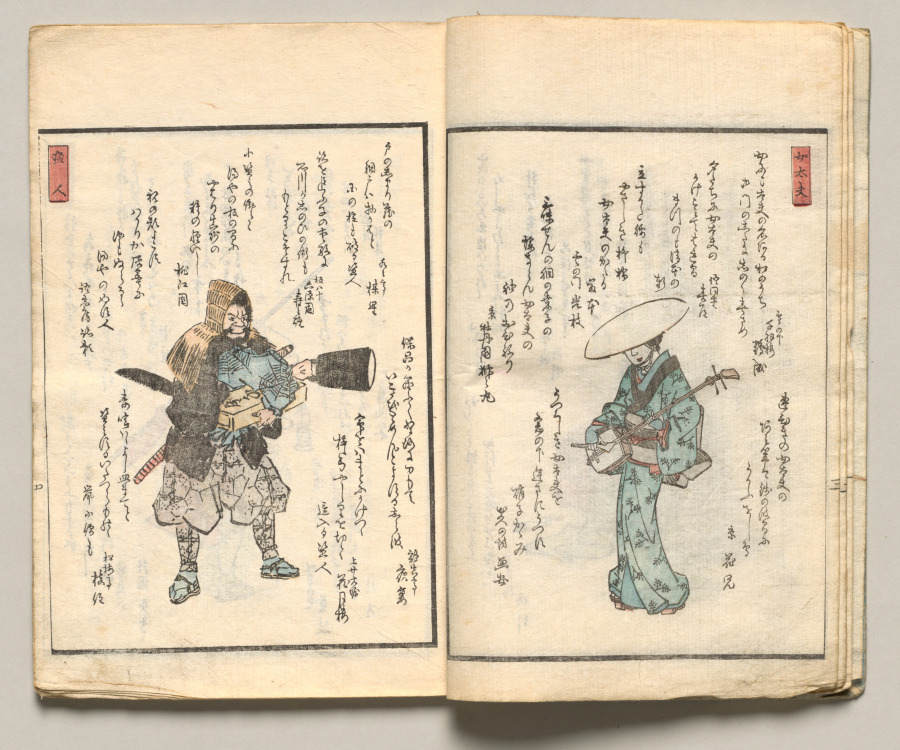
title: Spread Four from Volume Six of People of Japan in Light Verse (Kyōka)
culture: Japan, Edo period (1615–1868)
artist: Utagawa Hiroshige (Japanese, 1797–1858)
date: 1857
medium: Woodblock-printed book; ink and color on paper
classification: Bound Volume